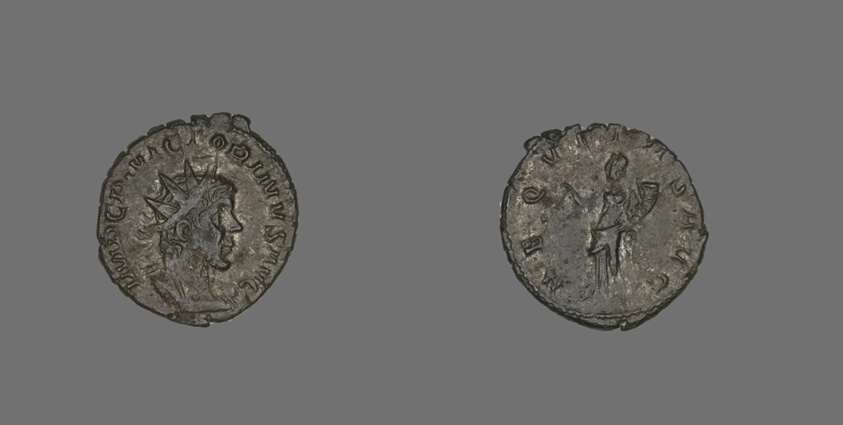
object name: Coin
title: Coin Portraying Emperor Victorinus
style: roman (ancient, style or period)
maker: Roman, minted in Trier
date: 268-270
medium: Bronze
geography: Trier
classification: coin; ancient art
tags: portrait